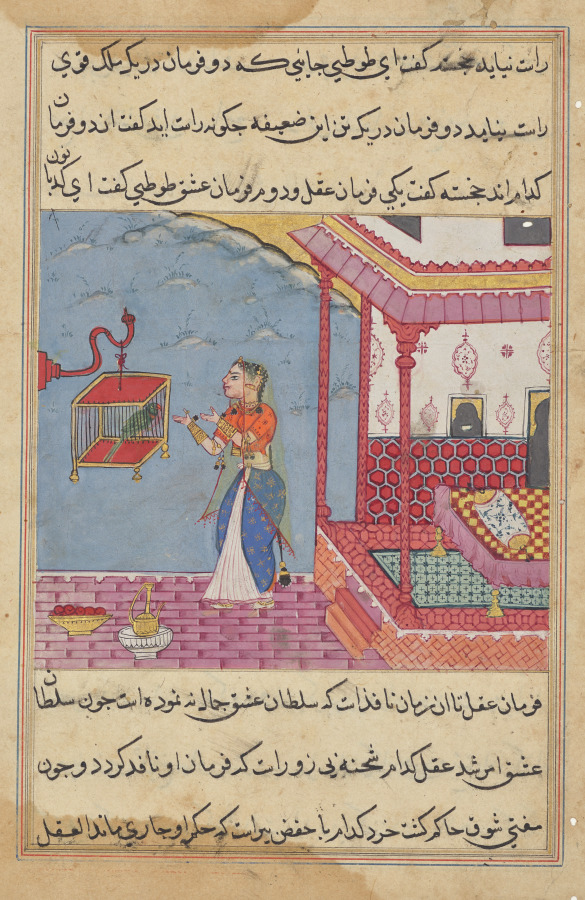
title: The Parrot Addresses Khujasta at the Beginning of the Twenty-Fourth Night, from a Tuti-nama (Tales of a Parrot)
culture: Mughal India, court of Akbar (reigned 1556–1605)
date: c. 1560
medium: gum tempera, ink, and gold on paper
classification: Painting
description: Before Khujasta can sneak away to meet her secret lover, her husband’s talking parrot, Tuti, begins to tell her a tale about a man named Bahir and his lover Habbaza. Like all Tuti’s stories, this is accompanied by a moral message and intended to keep Khujasta from leaving for the night.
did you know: The gold sky and blue hill are traits learned from Safavid Persian painting.